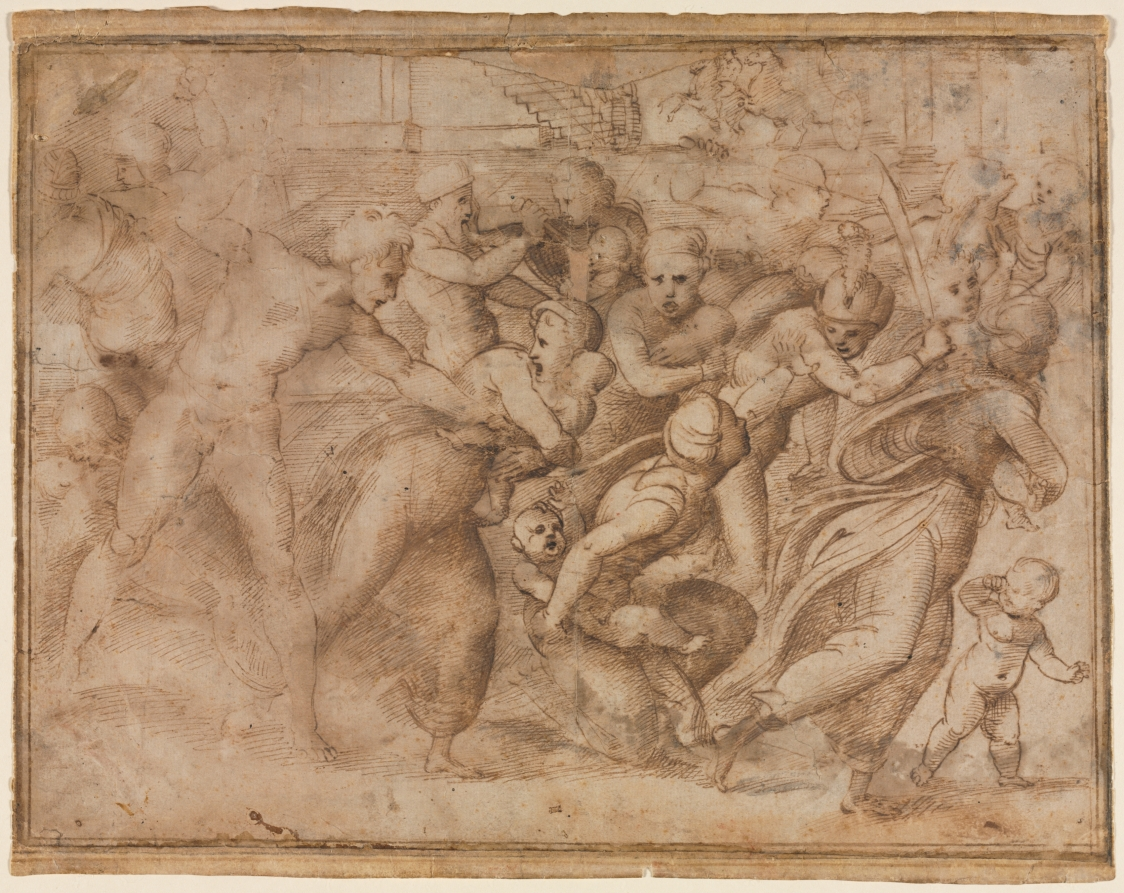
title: Copy of Raphael's Massacre of the Innocents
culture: Italy, 16th century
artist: follower of Raphael (Italian, 1483–1520)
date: after 1510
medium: pen and brown ink (iron gall) and brush and brown wash, heightened with traces of lead white(?) (oxidized); framing lines in brown ink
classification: Drawing